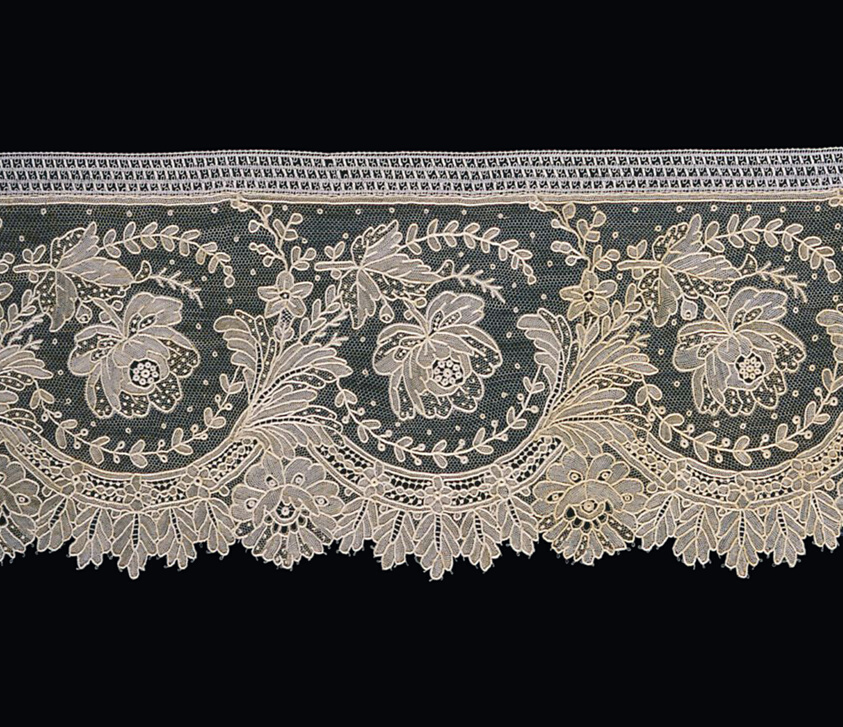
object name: Textile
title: Flounce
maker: Belgium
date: 1875/1900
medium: Cotton, needle lace of a type known as "Point de Gaze"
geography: Belgium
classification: textile; lace - needle